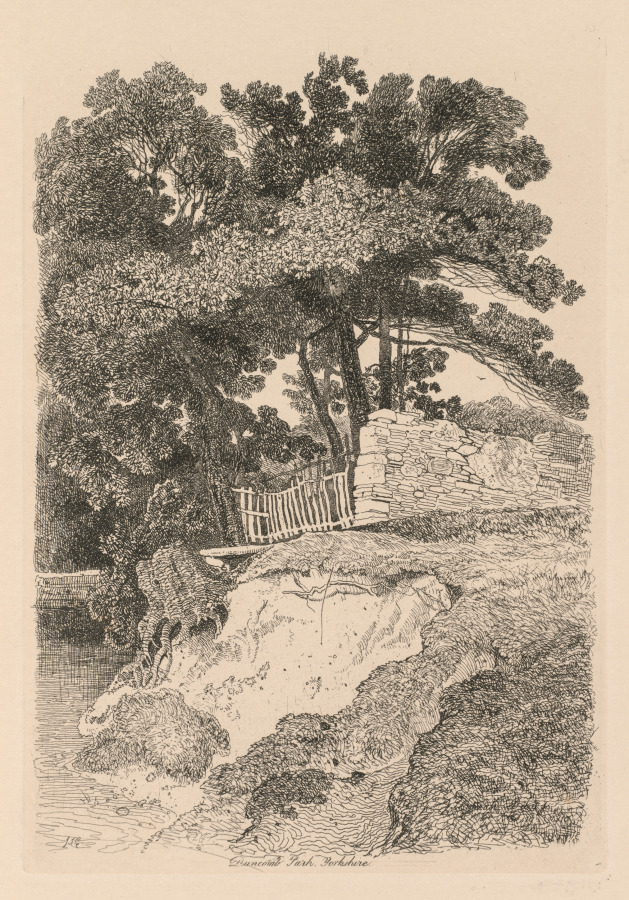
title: Liber Studiorum: Plate 13, Duncomb Park, Yorkshire: No. 5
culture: England, 19th century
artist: John Sell Cotman (British, 1782–1842)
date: 1838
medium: softground etching, from a bound volume containing 48 plates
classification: Bound Volume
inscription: In plate, within image, upper right: 13; in plate, lower left: JSC: in plate, below image: Duncomb Park, Yorkshire